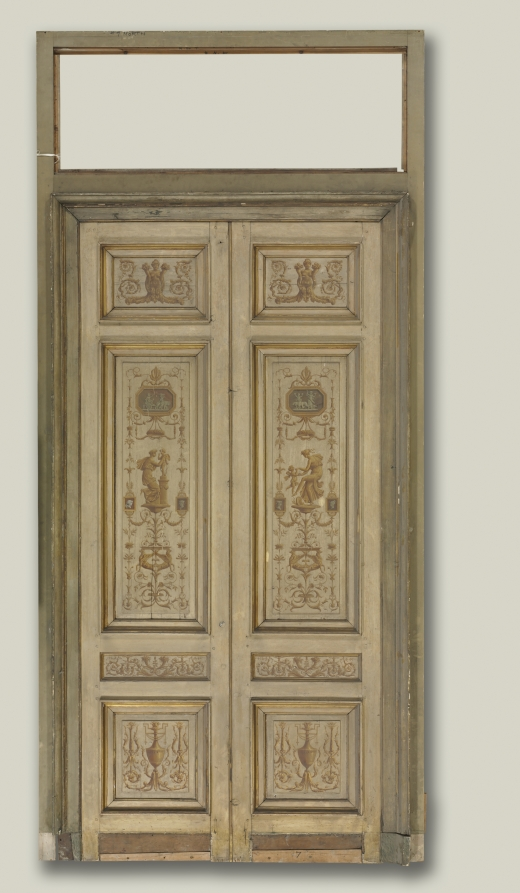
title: Double-Leaf Doors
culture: France, 18th century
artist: Pierre Rousseau (French, 1751–1829)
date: 1790s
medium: oil on wood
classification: Painting